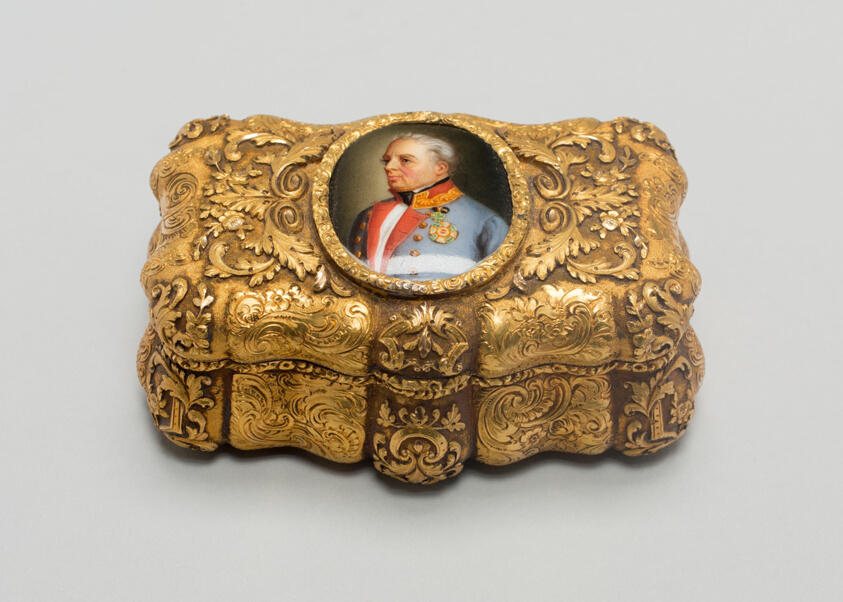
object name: Metalwork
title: Snuff Box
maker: Vienna, Austria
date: c. 1830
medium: Gold and enamel on copper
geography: Austria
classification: snuff box; european decorative arts; metalwork